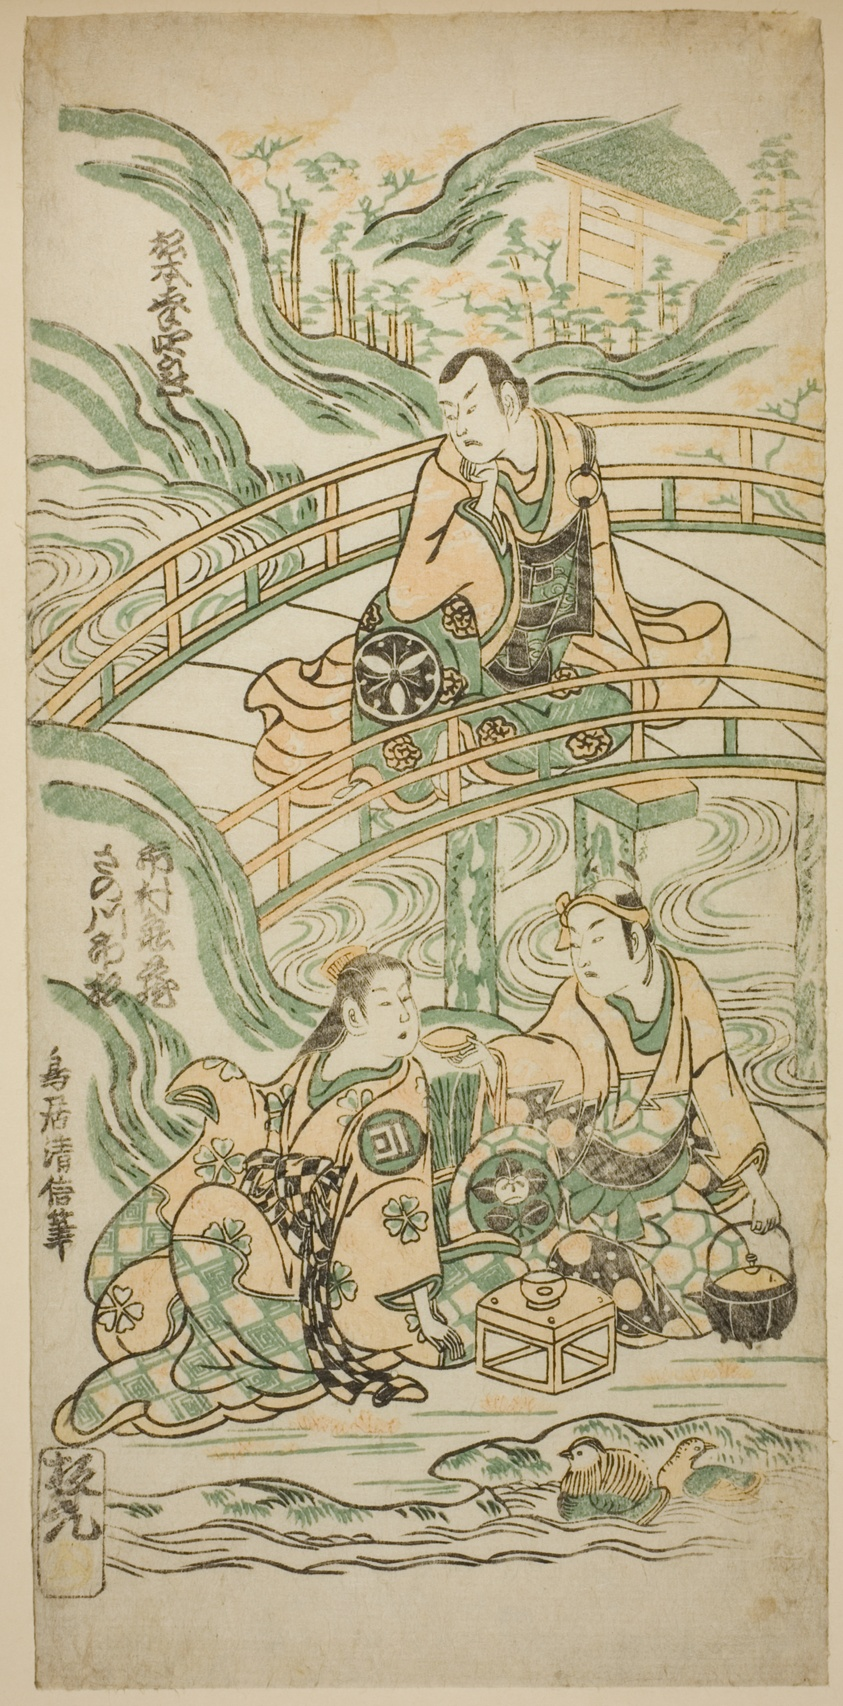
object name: Print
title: The Actors Matsumoto Koshiro II as Kumasaka Chohan, Ichimura Kamezo I as Ise no Saburo, and Sanogawa Ichimatsu I as Ushiwakamaru in the play "Hatsu Tora Kurama Genji," performed at the Ichimura Theater in the first month, 1749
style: Japanese (culture or style)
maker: Torii Kiyonobu II (Japanese, active c. 1725-61)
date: 1749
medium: Color woodblock print; hosoban, benizuri-e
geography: Japan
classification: woodblock print; print; asian art